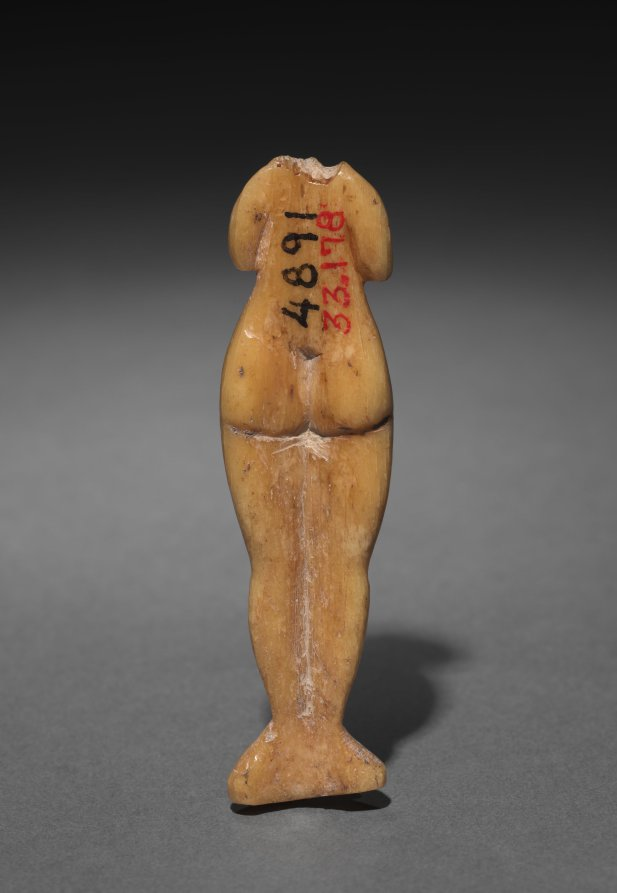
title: Figurine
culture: Parthian Empire (247 BCE–224 CE)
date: 1–200 CE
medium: bone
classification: Sculpture